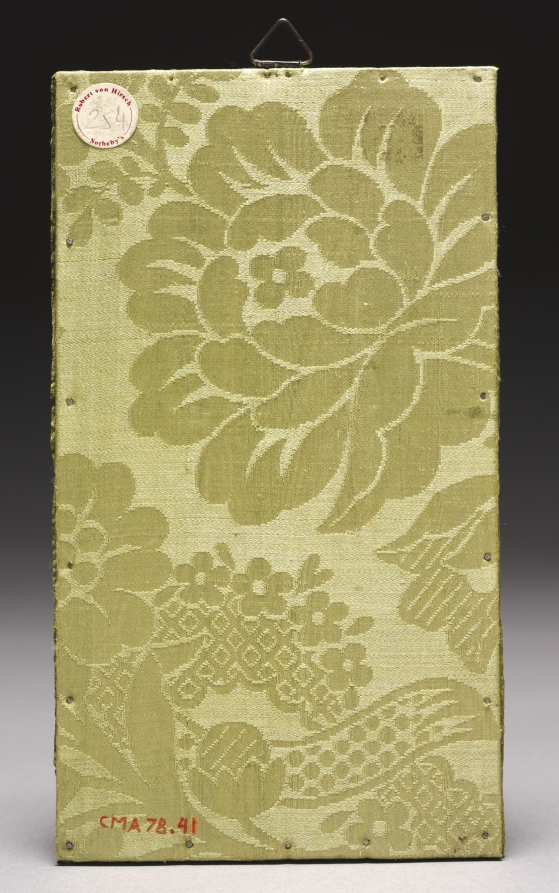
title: Plaque: The Crucifixion with Angels and Saints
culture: Northern Italy, Padua?, 15th century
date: c. 1400–1425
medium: verre églomisé (reverse gilded glass, engraved and painted)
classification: Glass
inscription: the letters on the banderoles may be described as a composite script called Gothic majuscule, which intermingles Roman capitals and uncial alphabets. This script was especially favored by Italian artists for inscriptions in architecture, sculpture, panel painting, and manuscript illustrations during the 14th and 15th centuries. The banderole on the left reads: "POSVIT. ME. DESOLAT.[UM]" (God has forsaken me); the other banderole reads: "CRUS. DOMINI. MECUM" (the cross of the Lord is with me). A third inscription with the abbreviations for the words of Pilate--"I. N. R. I." (IESUS, NASARENUS RES IUDAEORUM), or Jesus of Nazareth, the King of the Jews" appears on the plaque (tabula ansata) at the top of the cross.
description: Small glass plaques like this were often combined with plaques of painted wood and framed within elaborate architectural reliquaries or small altarpieces. The decorative technique, called verre églomisé, is a process in which the reverse side of a glass is gilded and then engraved with designs. The pelican, shown above the cross piercing its breast to feed its young, became a common symbol of Christ's sacrifice on the cross.